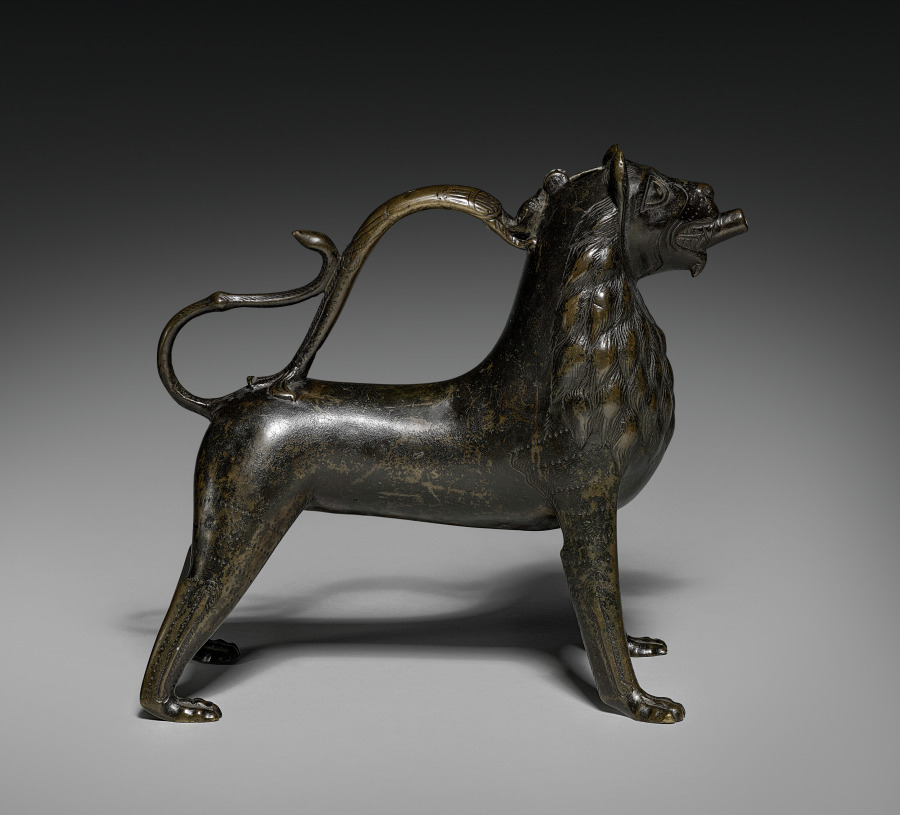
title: Lion Aquamanile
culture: Germany, Lower Saxony, Hildesheim, Gothic period, first half 13th century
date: 1200–1250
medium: bronze: cast, chased, and punched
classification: Sculpture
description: An aquamanile is a water vessel used for washing hands both at church altars and at the dinner tables of upper-class patrons. They often took the form of fantastic beasts such as dragons and unicorns or animals such as horses, birds, dogs, and lions, like this one.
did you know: The handle of this vessel is in the shape of a dragon with a long curving tail.